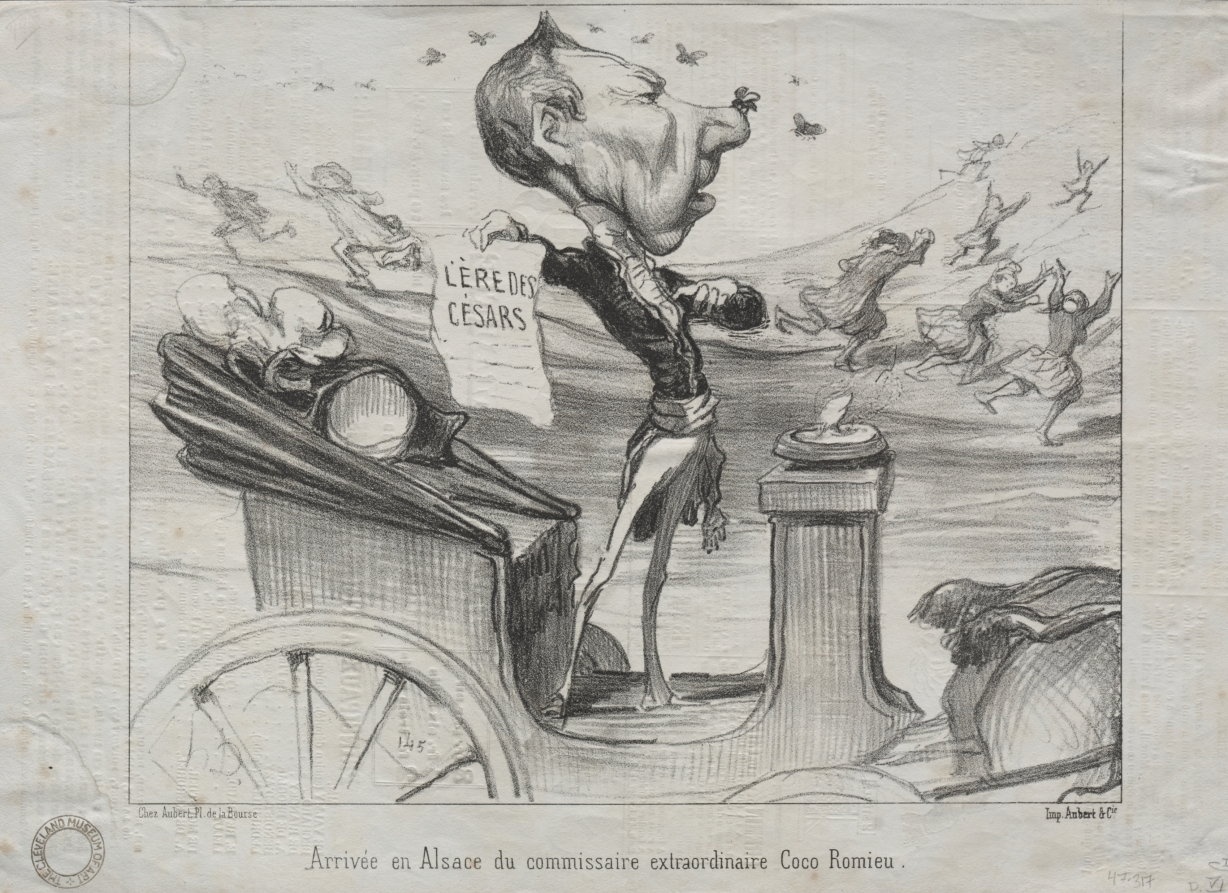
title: Arrival in Alsace of the extraordinary commissioner, Coco Romieu.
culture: France, 19th century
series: News of the Day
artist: Honoré Daumier (French, 1808–1879)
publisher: Aubert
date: 1850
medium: lithograph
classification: Print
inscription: Lower margin, pencil: 47.317 / II/II / D.vi 1990 ; stamp: THE CLEVELAND MUSEUM OF ART ; Lower margin, printed: Chez Aubert, Pl. de la Bourse / Imp. Aubert & Cie.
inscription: Above image, printed: ACTUALITÉS. / 81 ; Below image, printed: Arrivée en Alsace du commissaire extraordinaire Coco Romieu.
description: This print was published in Le Charivari (February 28, 1850) as plate 81 from the series News of the Day.